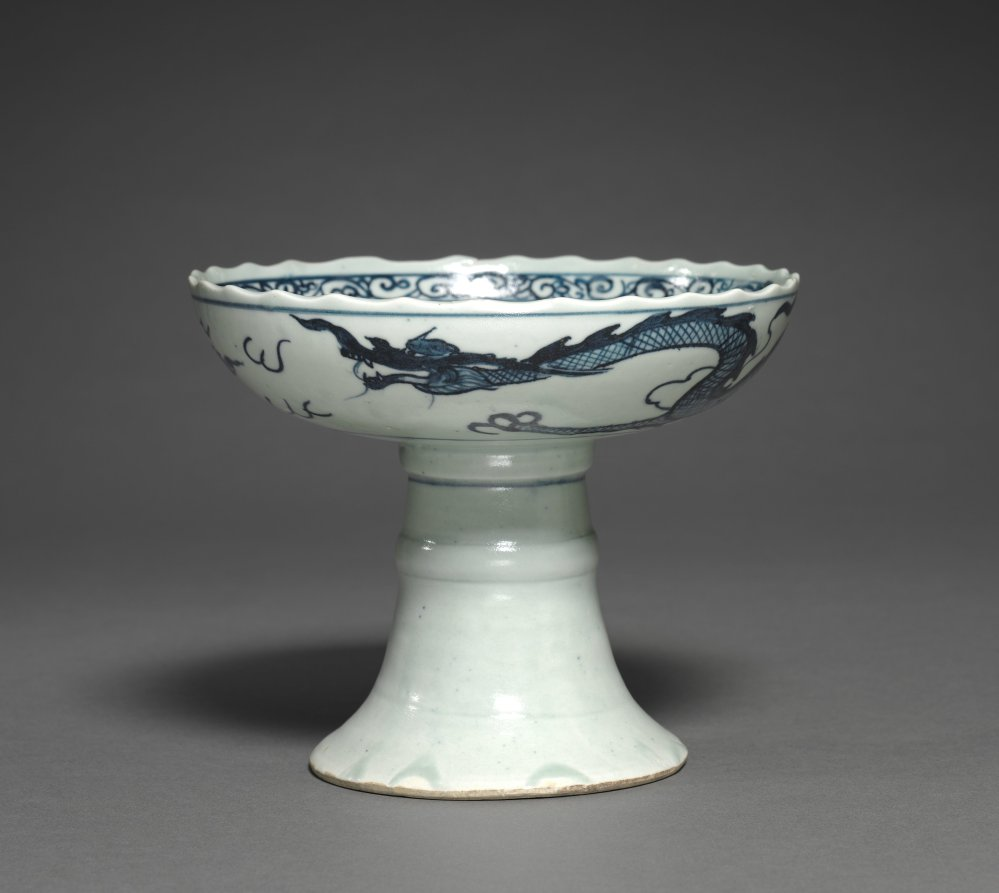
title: Stem Cup with Dragon Decoration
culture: Vietnam (Annam)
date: 1300s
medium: porcelain with underglaze blue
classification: Ceramic